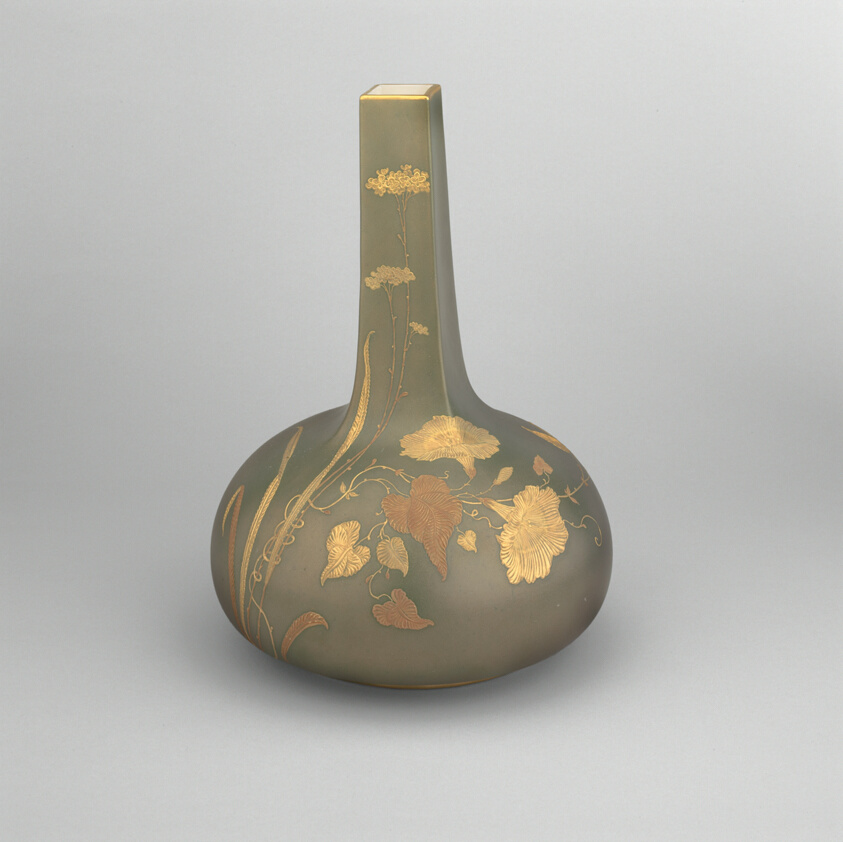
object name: Ceramics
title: Vase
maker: Ott and Brewer (American, 1871–1892); Trenton, New Jersey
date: 1882–90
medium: Belleek porcelain with gold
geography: Trenton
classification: vase; porcelain; american decorative arts; ceramics; pottery; decorative arts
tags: floral, foliage